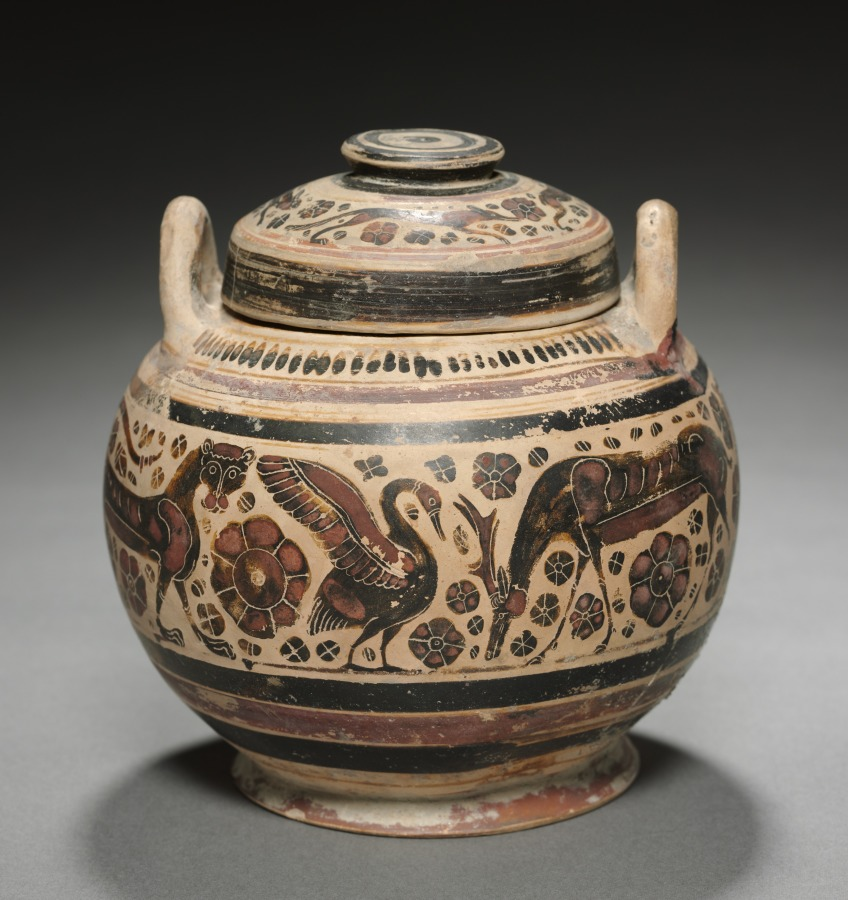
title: Black-Figure Pyxis (Cylindrical Lidded Box): Animals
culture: Greek, Corinthian (Middle-Late)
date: 500s BCE, with modern painting and incision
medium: ceramic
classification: Ceramic